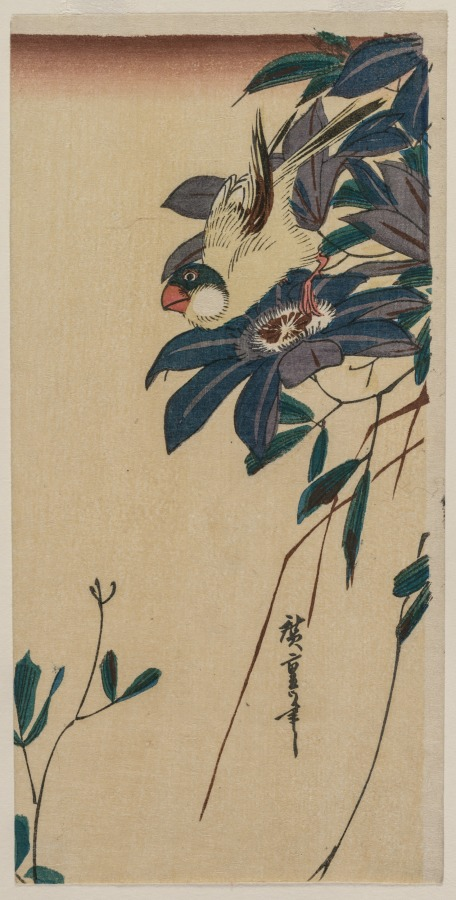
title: Grosbeak and Clematis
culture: Japan, Edo period (1615–1868)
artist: Utagawa Hiroshige (Japanese, 1797–1858)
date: mid-1830s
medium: color woodblock print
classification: Print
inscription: Signature: Hiroshige hitsu